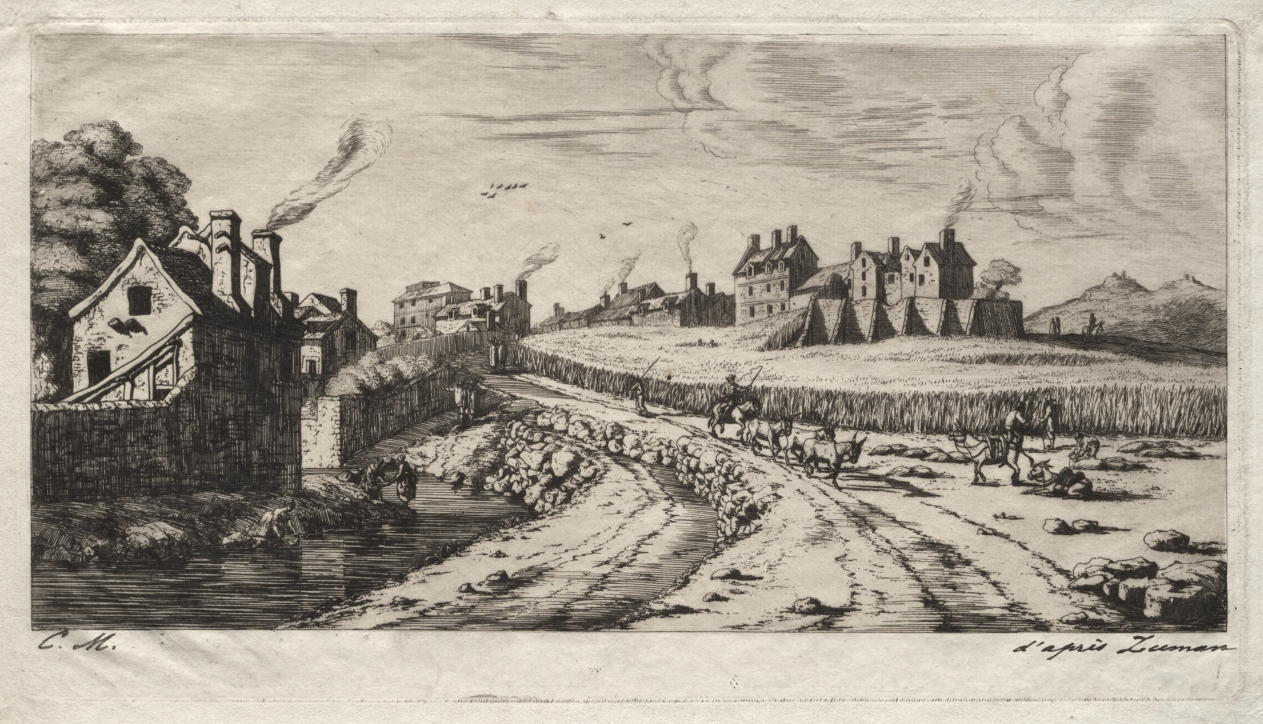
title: Entrance to the Faubourg, Saint-Marceau, Paris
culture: France, 19th century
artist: Charles Meryon (French, 1821–1868)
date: 1850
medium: etching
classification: Print